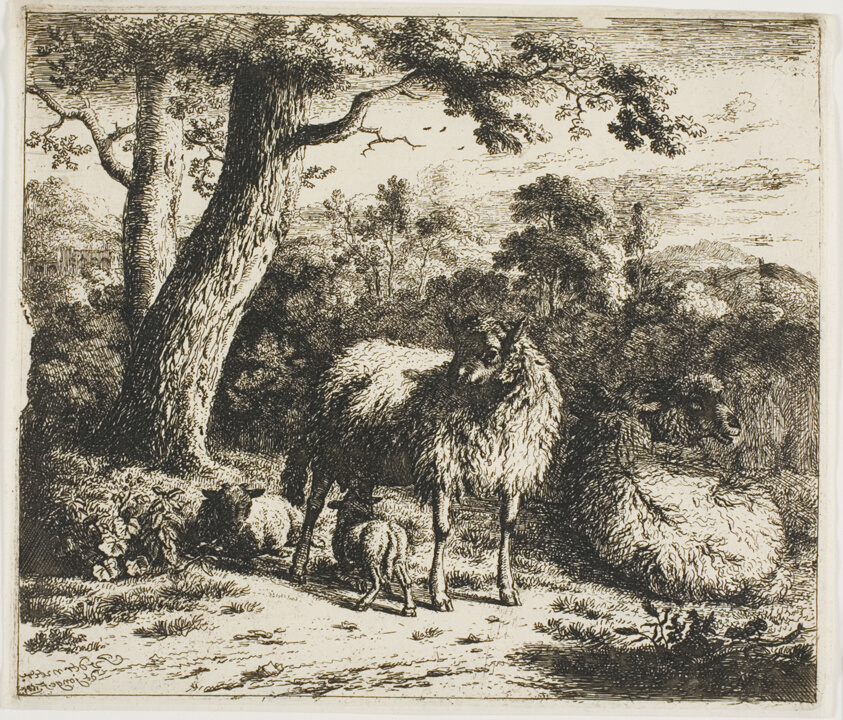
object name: Print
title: Standing Sheep and Two Lambs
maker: Jan van der Meer de Jonghe II; Dutch, 1656-1705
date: 1685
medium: Etching on ivory laid paper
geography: Netherlands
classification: etching; print; prints and drawing